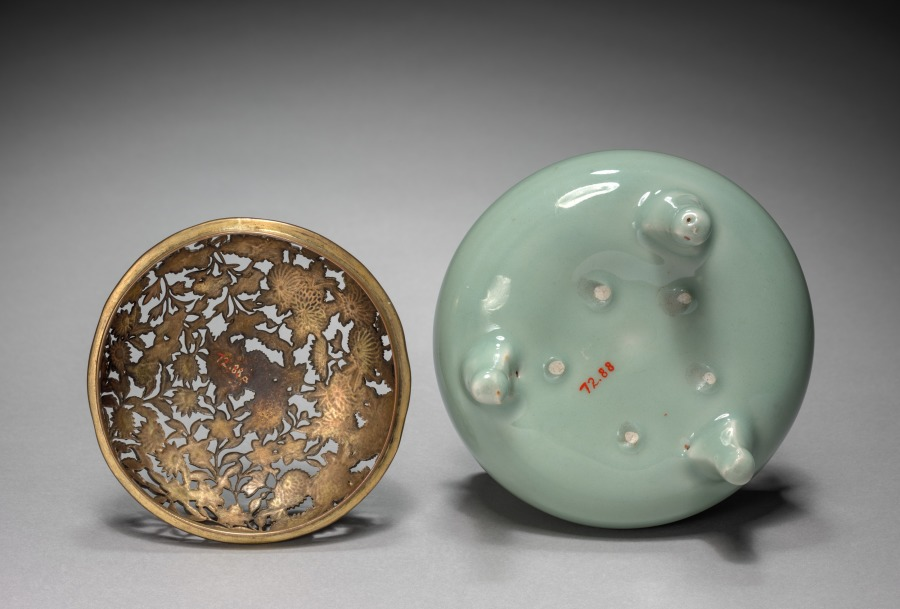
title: Covered Incense Burner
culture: Japan, Meiji period (1868–1912)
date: late 1800s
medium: Porcelain with gilt bronze cover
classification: Ceramic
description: This incense burner emulates Chinese porcelain in its glaze and form. A number of prominent Meiji-period ceramicists explored classical Chinese forms and glazes even as they also produced stoneware with Japanese-style glazes.